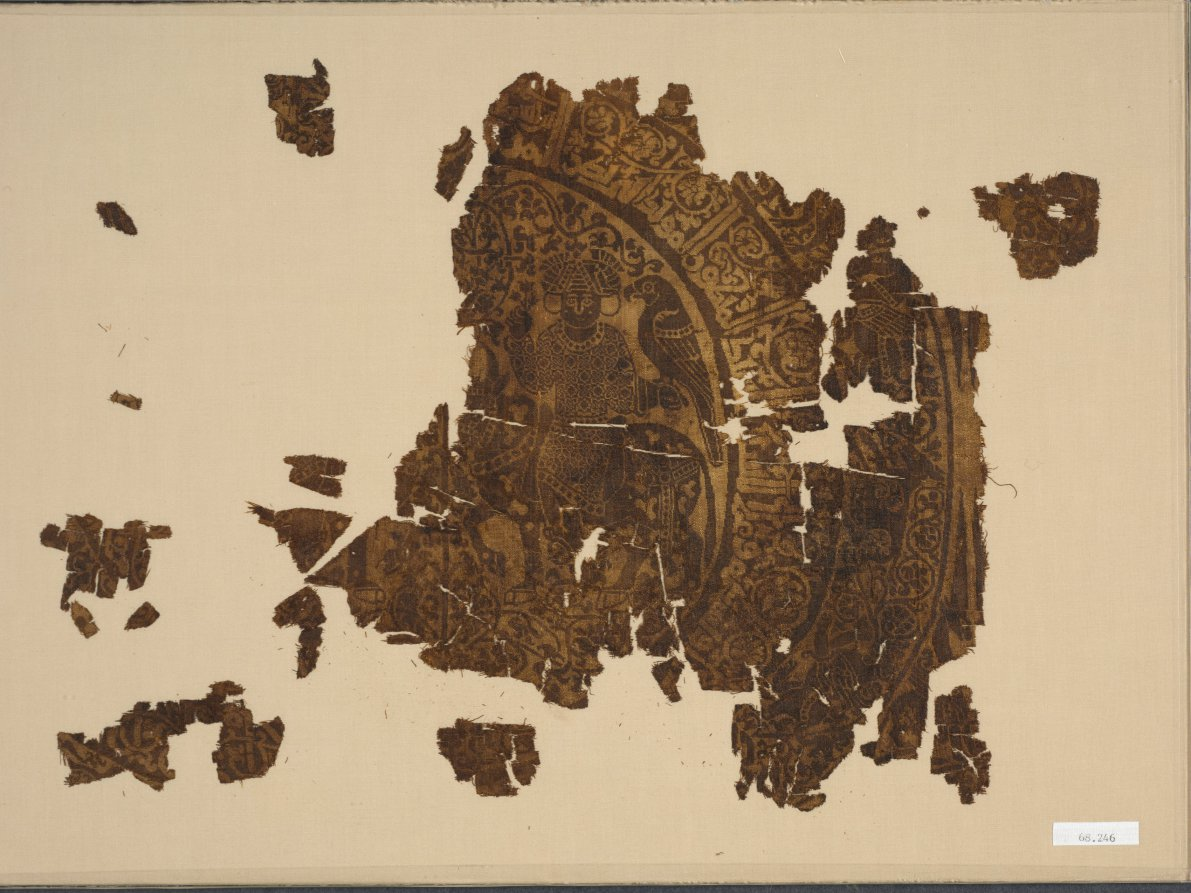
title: Fragment with falconer riding a bull in a rondel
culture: Iran, Rayy, Seljuk period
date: 1000s–1100s (radiocarbon date, 95% probability)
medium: Silk: double cloth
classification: Textile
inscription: inner band of a foliate Kufic inscription: ". . . . . . wa-bastah wa-'ala['] lil-shay[kh?] al-sayyid al-mansur al-mu['a] yyad Abi Nasr . . . bin[?] . . ."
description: The princely sport of falconry was frequently represented in medieval luxury silks. Here, the falconer wears a jeweled turban, the most significant item of men’s dress, and rides sidesaddle on a bull. His tunic displays two small designs: overlapping octagons and the conventional star and cross motif. On his gloved hand, he probably supports a coveted gyrfalcon, a large, superior bird. The border displays an inner inscription and an outer animal procession, an ancient Near Eastern theme, of real and mythical creatures. This double cloth has two distinct layers that exchange position according to the pattern. The crisply broken edges and scattered brittle threads are typical of the fragility of authentic medieval Iranian silks.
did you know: The falconer's round face with delicate features represents the ideal Iranian beauty, complemented by the chic round hairballs beside his cheeks.